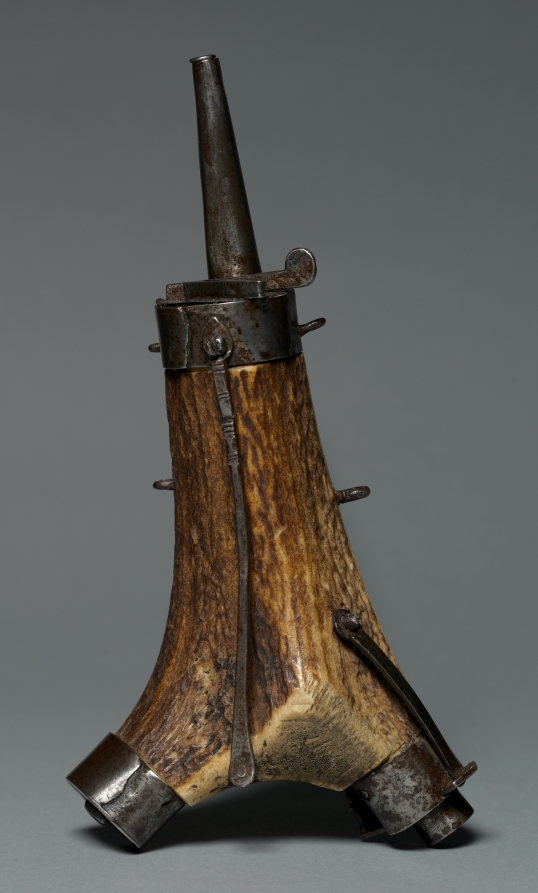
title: Powder Flask with Standing figures of a Man and Woman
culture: Germany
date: 1570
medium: elk horn, steel mounts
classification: Arms and Armor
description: Powder flasks are small, portable containers designed to hold gunpowder. From the 1400s to the 1800s, powder flasks were indispensable for charging and priming firearms of all types. Without powder flasks firearms were of little use to their owners. Many highly decorated flasks rank as works of art. During the 1500s, they were frequently decorated with images of famous historical figures.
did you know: The year 1570 can be seen below the standing male and female who may represent the original owners.